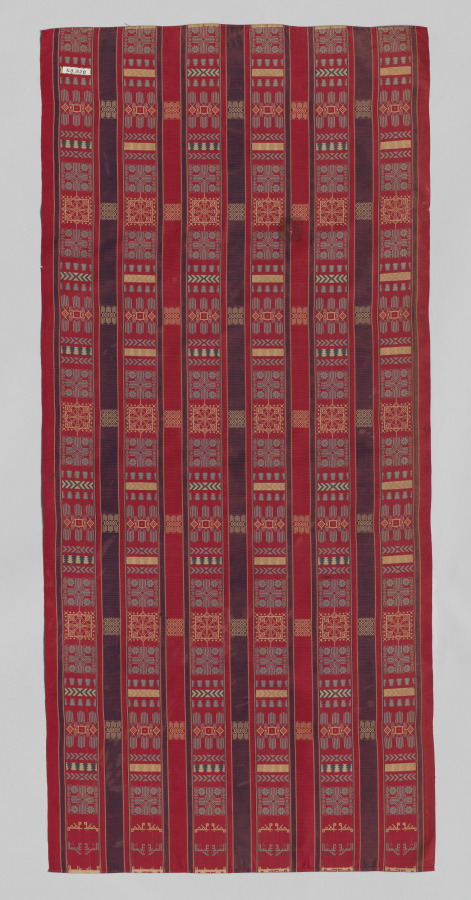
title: Panel from a Head Covering (‘Ajar)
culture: Africa, North Africa, Tunisia, probably Testour or Tunis, Tunisian weaver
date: probably 1800s or early 1900s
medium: Silk, metal, dye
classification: Textile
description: This panel was part of an urban Tunisian woman’s head-covering (‘ajar). Two such panels flanked a face-obscuring black panel. Such luxurious garments of seclusion were once reserved for elites. The decorative panels draped down when worn, showing off the finely woven motifs and demonstrating the wearer’s family wealth. Arranged in bands, motifs include stylized trees (or protective hands), flowers, eight-pointed stars, and geometric designs. The mirrored Kufic (squared Arabic script) lettering in teal is likely the name of the weaver or panel owner. Weavers with Muslim Andalusian (southern Spanish) heritage originally made these, drawing from Andalusian and Turkish motifs; later, workshops in Tunis produced them.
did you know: The khamsah (خمسة), an open five-fingered hand, is a protective motif. It is woven in red in multiple ways on this panel.